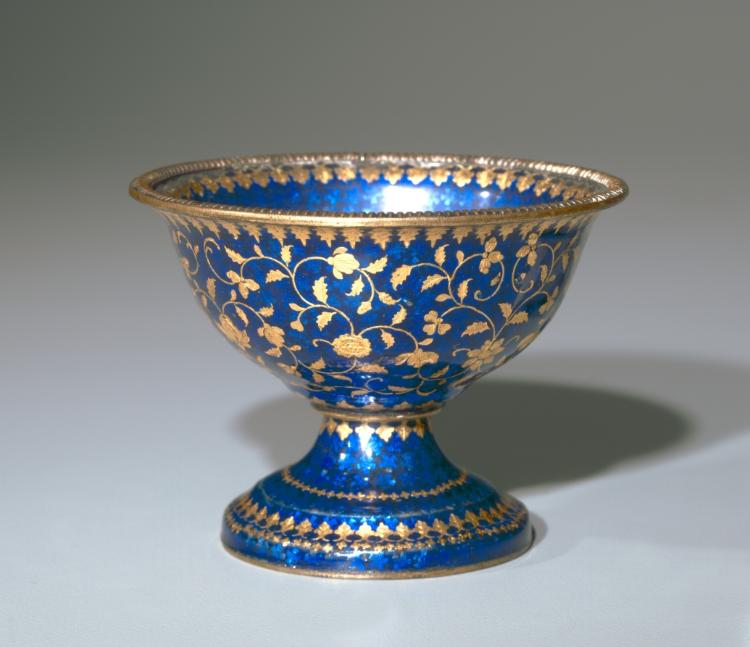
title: Stem Cup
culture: India, Jaipur, 17th-18th century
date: 1600s-1700s.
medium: enamel on copper, gold and silver leaf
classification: Enamel